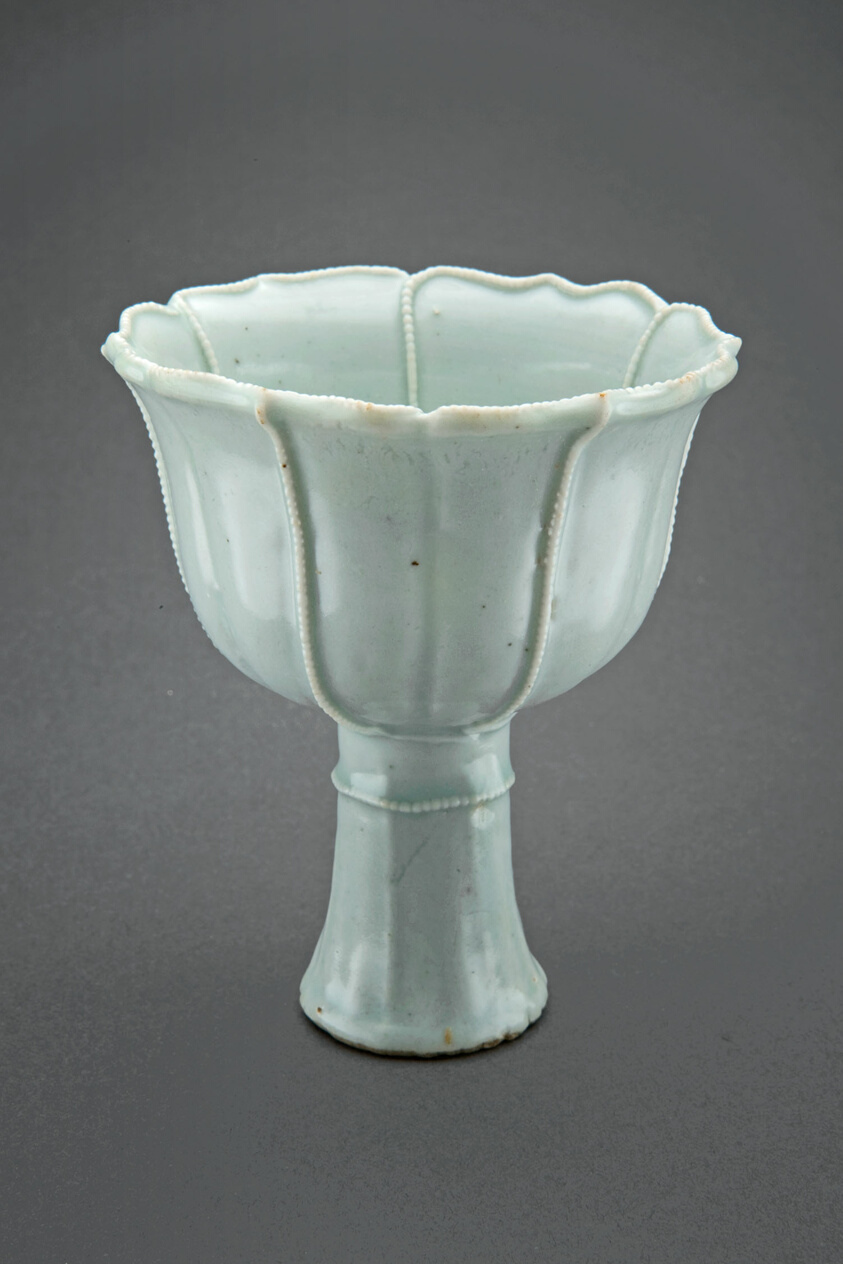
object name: Vessel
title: Stemcup with Pearl-Edged Lobes and Central Floret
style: Chinese (culture or style)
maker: China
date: Yuan dynasty (1271–1368)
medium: Qingbai ware; glazed porcelain with underglaze applied decoration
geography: China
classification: vessel